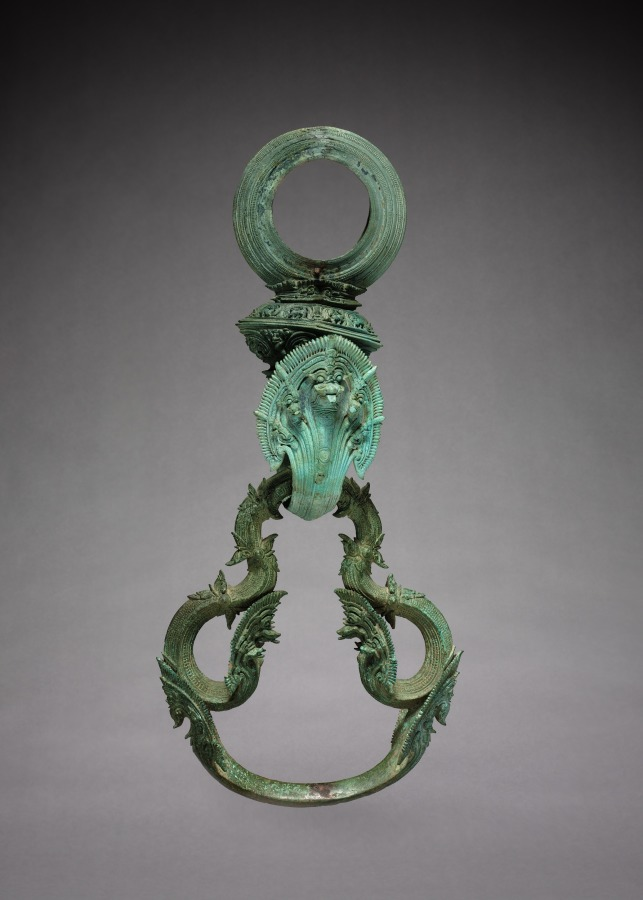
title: A Pair of Decorated Palanquin Hooks and Rings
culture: Cambodia, Angkor Wat Style, 12th century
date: 1100–1175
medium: bronze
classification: Sculpture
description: Hooks, suspension rings, and finials cast in bronze are very common fixtures in Cambodian decorative art. Frequently they served a practical function, such as the present set, used for a palanquin in which a person was carried from place to place. The litter or throne was fastened to the rings which in turn were suspended from the books fixed by bolts to transverse poles carried on the shoulders of the palanquin bearers. Chariots, palanquins, furniture, and harnesses were frequently embellished with various bronze decorations, finials, and fixtures. Those, as a rule, were gilded making the objects they served look very sumptuous. The relief sculpture found on various Khmer monuments, such as Angkor Wat or Bayon for instance, illustrates well the use and context of those bronze implements in ancient Cambodian life. These frequently elaborate bronze fixtures were decorated with motifs generally popular in Cambodian art: such as nagas, garudas, floral, or animal patterns. This pair of hooks and rings, unusually large in size, take on a naga form in the hooks. They are decorated with perforated floral and animal motifs done with great care and precision. The rings, suspended from hooks, are in the form of tri-fold flower stalks with naga motifs repeated at the end of the curved stalks. Such elaborate and huge hooks and rings must have, no doubt, decorated a palanquin of an important individual, possible a ruler himself. Their decoration is typical of the mature Angkor Wat style.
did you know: The naga, a water serpent with a multi-headed hood, is a Khmer national emblem.